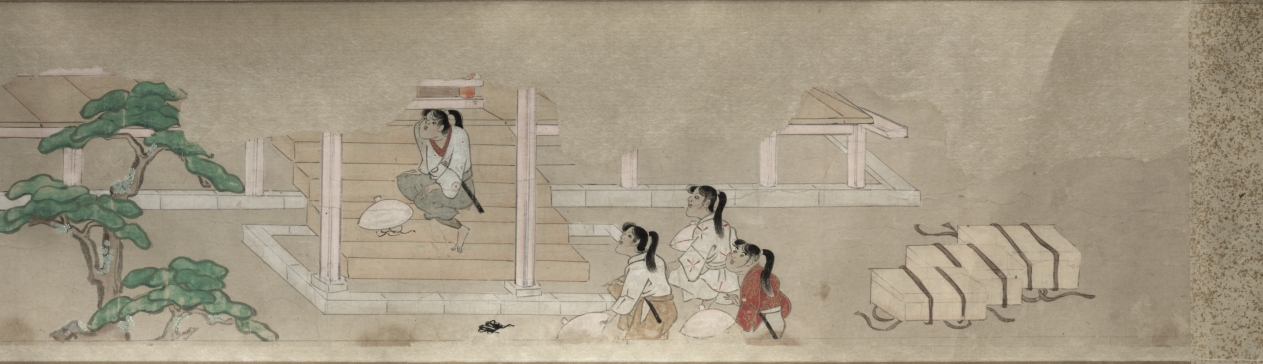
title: The Saltmaker's Story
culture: Japan, Edo period (1615–1868)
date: early 1600s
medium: One of a pair of handscrolls; ink, color, and gold on paper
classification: Painting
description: Once read and copied by girls at New Year’s celebrations and included in dowries, The Saltmaker’s Story is a rags-to-riches tale in which daughters are gifts from the gods. Despite his simple outlook, the main character progresses from humble roots as an associate at Kashima Shrine to the elite status of grandfather of the emperor through the intervention of the Kashima deity. The Saltmaker’s Story is traditionally presented in a set of three scrolls, but the text of this set has been removed by a previous owner, who remounted the illustrations as a pair. The paintings of this one take us from right to left through the second half of the tale.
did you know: This handscroll originally had texts before its paintings, but the texts were removed.